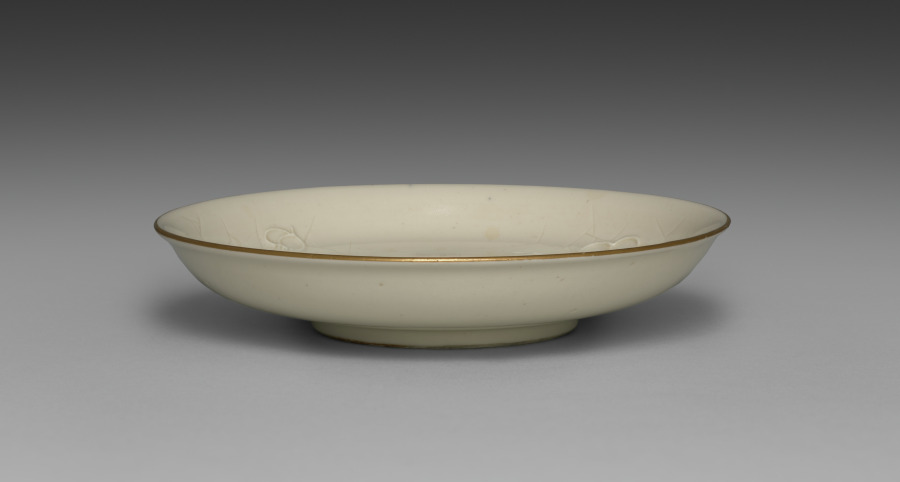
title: Medium-sized Dish from Dining Set with Plum Blossoms and Cracked-Ice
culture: Japan, Meiji period (1868–1912)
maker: Seifū Yohei II (Japanese, 1844–1878)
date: c. 1875–78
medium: Porcelain with molded designs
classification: Ceramic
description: Each item in this set has a delicate low-relief design of flowering plum branches over scattered, intersecting lines meant to resemble the cracked-ice surface of a frozen body of water and is signed on the base in gold pigment. While Yohei II produced many fine works in underglaze blue, like those produced by Kiyomizu Shichibei, he also made works in quite different styles later in his career, from the early 1870 s. In 1873, he was appointed purveyor to the Industrial Center of Kyoto Prefecture, a designation associated with Kyoto’s efforts to reach an international market through the port of Kobe; and from 1875 until his death, he was involved in national-level projects to present Japanese ceramics across the world. It was during this period that Yohei III was apprenticed to Yohei II, and it has been suggested that this set may in fact be an early example of Yohei III’s work, which he signed with his teacher’s name. Decorated with flowers resembling Japanese textile motifs, the set calls to mind the design of Yohei II’s pair of vases with plum blossoms in the Victoria and Albert Museum. Here, the elaborate trees created for a formal public exhibition setting have been translated into the approachable blossoms of the genteel domestic environment. While the designs are consistent across the pieces, each raised flower petal and pistil and each incised line in the ice was done by hand, so the cups, bowls, and dishes are similar yet unique. The bottoms of two boxes once identified the set’s owner, but the information has been deliberately obscured with black ink. However, inscriptions still visible appear to indicate two occasions, once at the end of July 1886 , and once again in June 1916 , when parts of the set were requested from Hokura in Niigata Prefecture. The location corresponds to a neighborhood in the present-day city of Jōetsu. The surname Tsuji 辻 also appears on a paper tag affixed to one of the box cloths. Future research may possibly reveal more about their provenance. A vase by Yohei III in a private collection combines the formal grandeur of the Yohei II vases in the Victoria and Albert Museum with the gentler design of this dining set, placing flowering plum trees against soft, scalloped-edge clouds resembling those in golden screens.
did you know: The dining wares have a creamy white coloration that the four boxes containing them identify as Korean in style.